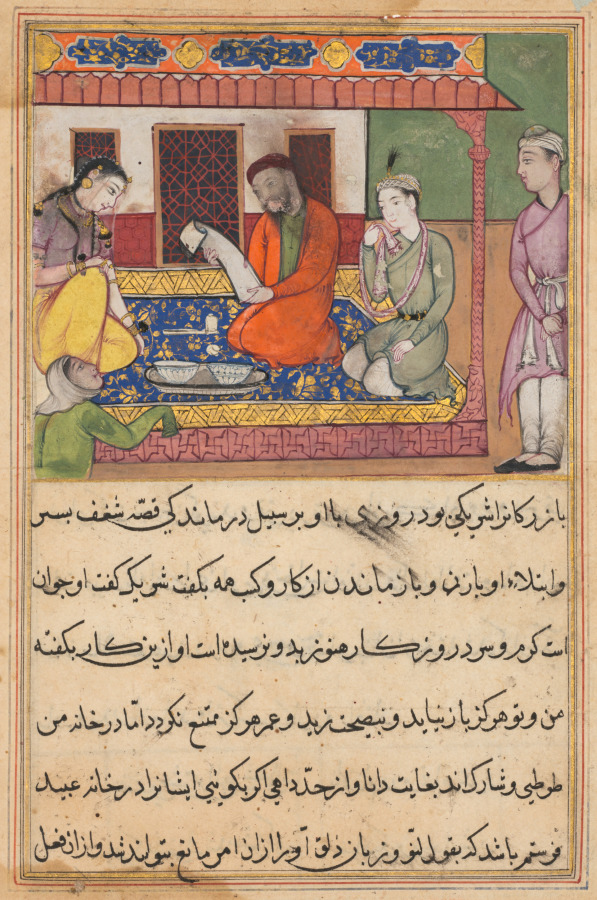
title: The marriage of ‘Ubaid, son of a merchant of Tirmiz, from a Tuti-nama (Tales of a Parrot): Forty-second Night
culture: Mughal India, court of Akbar (reigned 1556–1605)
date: c. 1560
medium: gum tempera, ink, and gold on paper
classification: Painting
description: The young ‘Ubaid, wearing green, sits across from his new wife on a blue and gold arabesque carpet. ‘Ubaid is so infatuated with his bride’s beauty that he begins to neglect his regular duties. His worried father consults a talking parrot and myna bird for advice on how to restrain his son’s excessive devotion.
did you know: The woman in green is the chaperone of ‘Ubaid’s new wife.